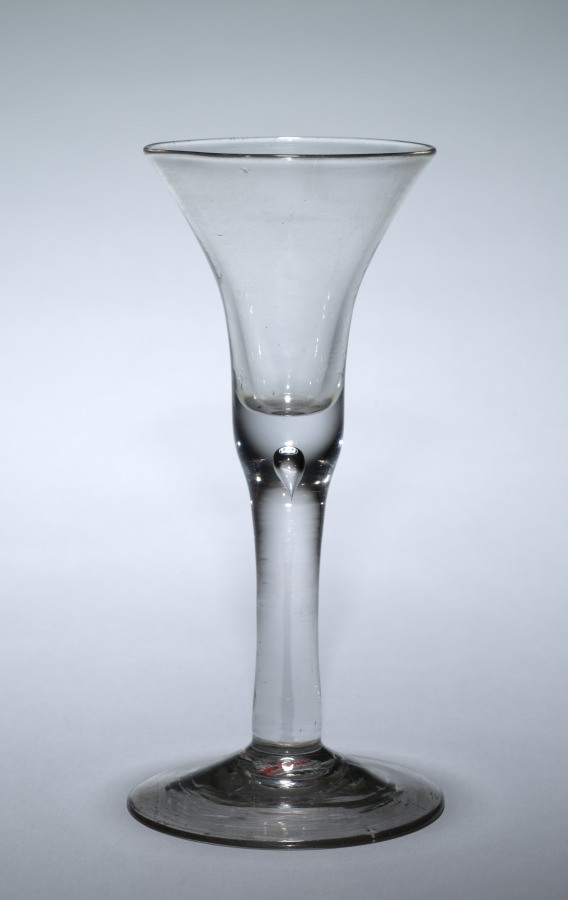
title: Wine Glass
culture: England, 18th century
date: 1700–1725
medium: glass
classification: Glass